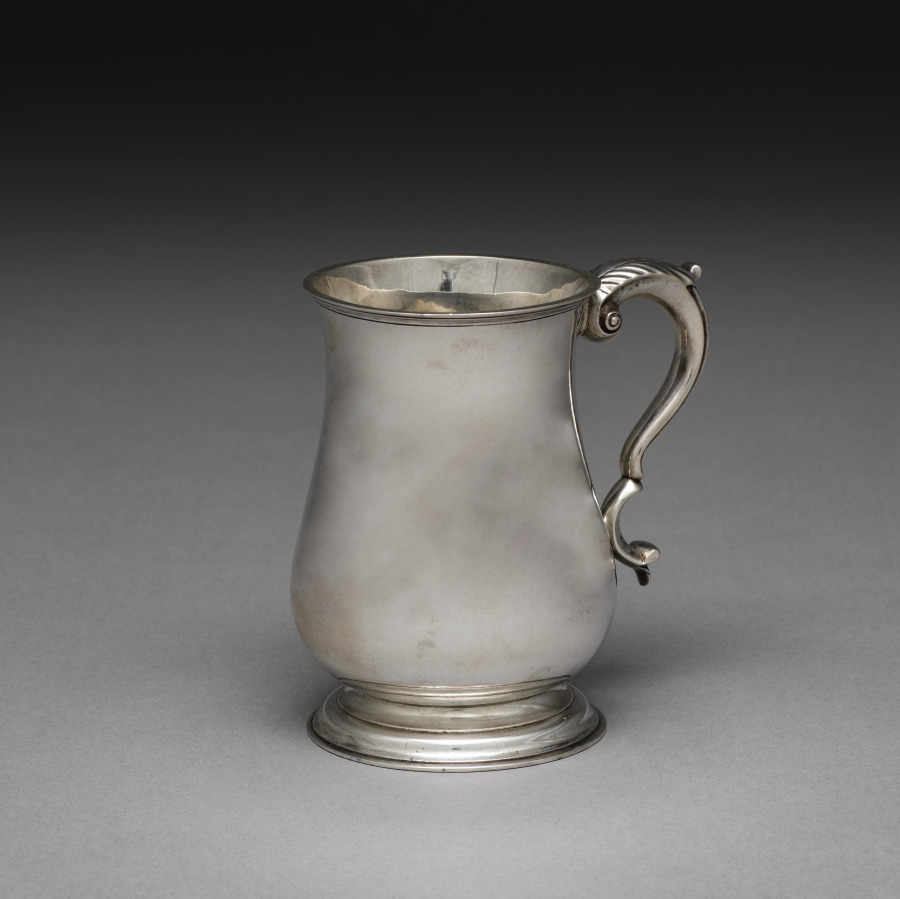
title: Cann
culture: America, Pennsylvania, Philadelphia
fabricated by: Thomas Shields (American)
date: c. 1765–75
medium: silver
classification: Silver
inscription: Scratched underside: "15-3" and illegible scratches